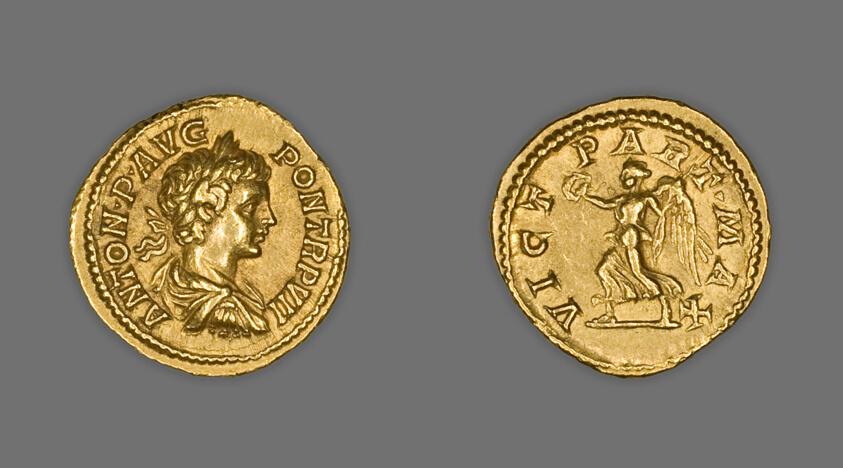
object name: Coin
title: Aureus (Coin) Portraying Emperor Caracalla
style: severan, imperial (roman), ancient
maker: Roman, minted in Rome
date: 204 (January-April), issued by Septimius Severus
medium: Gold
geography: Rome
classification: coin; ancient art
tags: portraits, children